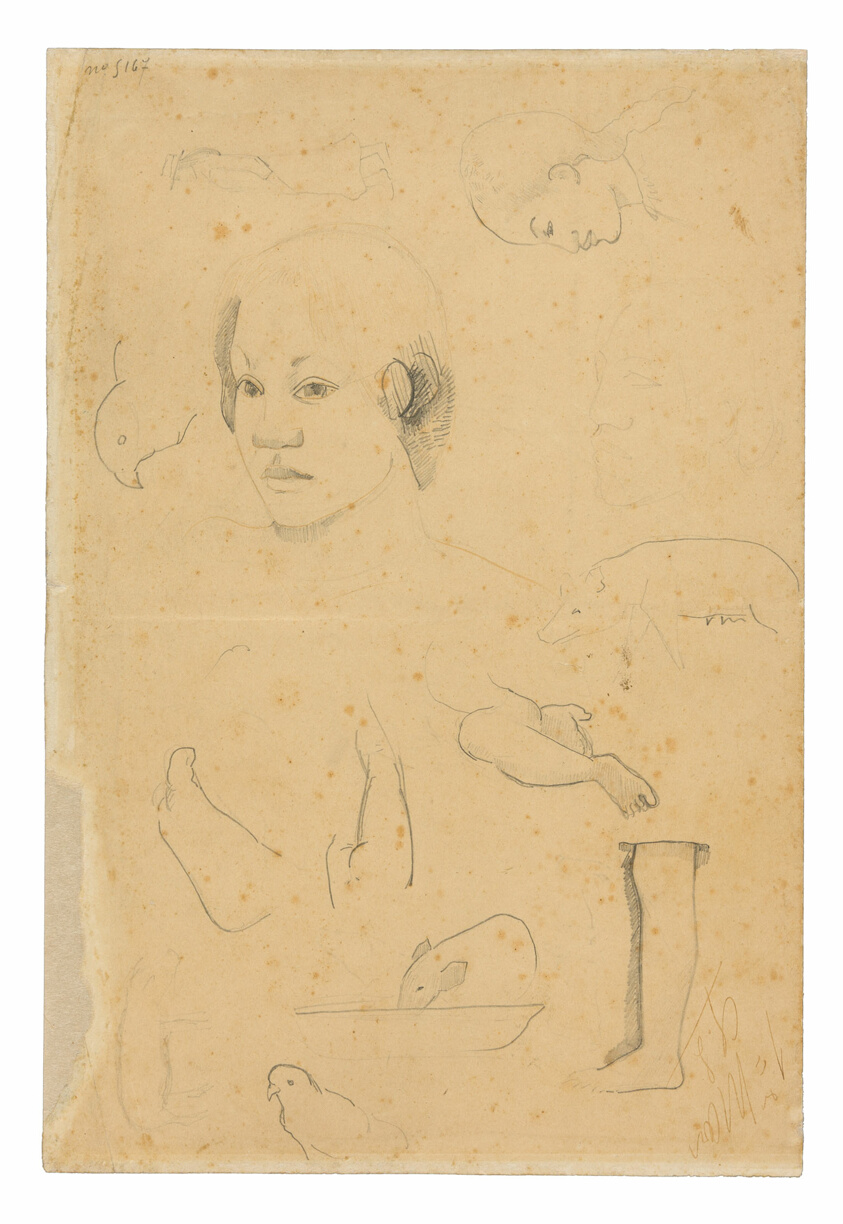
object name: Drawing and Watercolor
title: Sketches of Various Animals and Head (recto), Sketches of a Head, Figure in Profile, Anatomical Details, and Animals (verso)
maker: Paul Gauguin (French, 1848-1903)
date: 1891/93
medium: Graphite (recto); graphite, with pen and pale-yellow ink (originally purple) (verso); on cream wove paper, discolored to tan (removed from a sketchbook)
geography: France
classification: graphite; drawings (visual works); prints and drawing